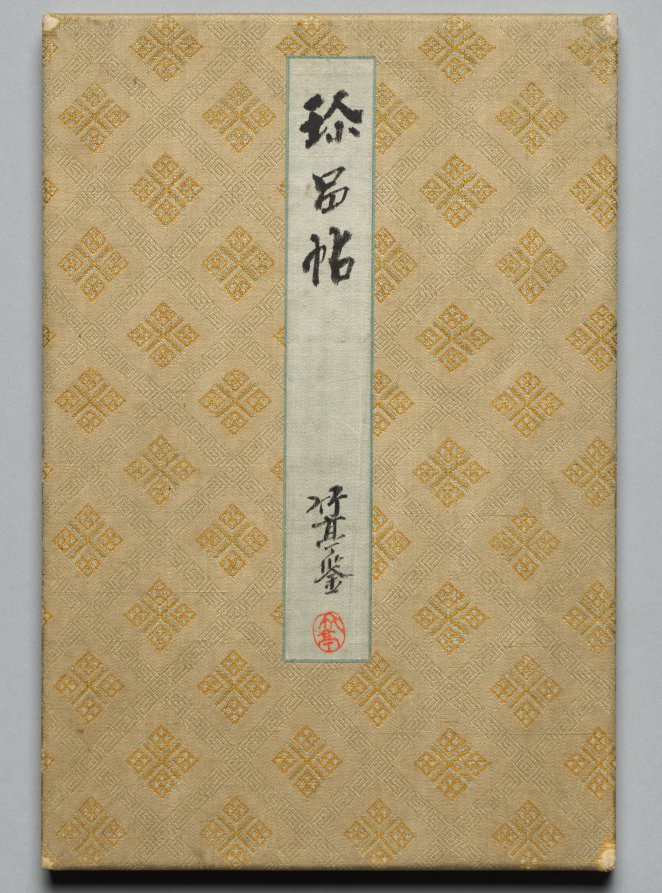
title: Album of Precious Works from Famous Early Modern Calligraphers and Painters (Volume 2)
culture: Japan, Edo period (1615–1868)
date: late 1700s to mid-1800s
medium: One of a pair of folding albums; ink and light color on silk, or ink on paper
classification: Portfolio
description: This album begins with a painting of plum and bamboo by Tanomura Chikuden (1777–1835) dated to the first day of 1818. It ends with an undated scene of someone going to visit a friend by Okada Hankō (1782–1845). In between are nine compositions by a variety of artists. There are poems and inscriptions by Rai San'yō (1780–1832) and Rai Shunsui (1746–1816). There are also paintings by Okada Beisanjin (1744–1820), Uragami Gyokudō (1745–1820), Nagamachi Chikuseki (1747–1806), Noro Kaiseki (1747–1828), Aoki Mokubei (1767–1833), and Nukina Kaikoku (1778–1863), who appends a poem to his composition. While most of the paintings are not dated, those that are indicate that the group was painted over a large span of time, rather than on a single occasion. Nagamachi Chikuseki’s figure on a bridge is dated to the 10th lunar month of 1789, while Nukina Kaikoku’s colorful island retreat is from 1833. Aside from the opening composition by Tanomura Chikuden, all the paintings are landscapes following recognizable Chinese brush methods transmitted to Japan through a variety of methods including printed manuals. The calligraphers and painters whose works are represented in the album were all deeply interested in Chinese culture. They were especially attracted to the idea they found in Chinese society of a community of educated friends who shared works in prose, poetry, and painting among one another through correspondence or gatherings. The ideal was a group who were not professional artists, creating works for clients, but a group who produced works to nurture friendships and cultivate their own minds. The cover of the album has a title slip reading Album of Precious Works, and is signed Mirror of the Bamboo Pavilion, or Chikuteikan (竹𠅘鉴 ), with a round, red seal reading Chikutei. This is a pseudonym used most likely by a Japanese person interested in calligraphy composed in Chinese and paintings with Chinese styles and themes. The name evokes a pavilion set in a bamboo grove an image strongly associated with China in Japan. Pseudonyms of this type were and continue to be used by those engaged in cultural pursuits such as poetry composition, painting, and collecting art. Having such a name takes one out of the normal business of life, and transports one to a space of creativity and aesthetic appreciation.